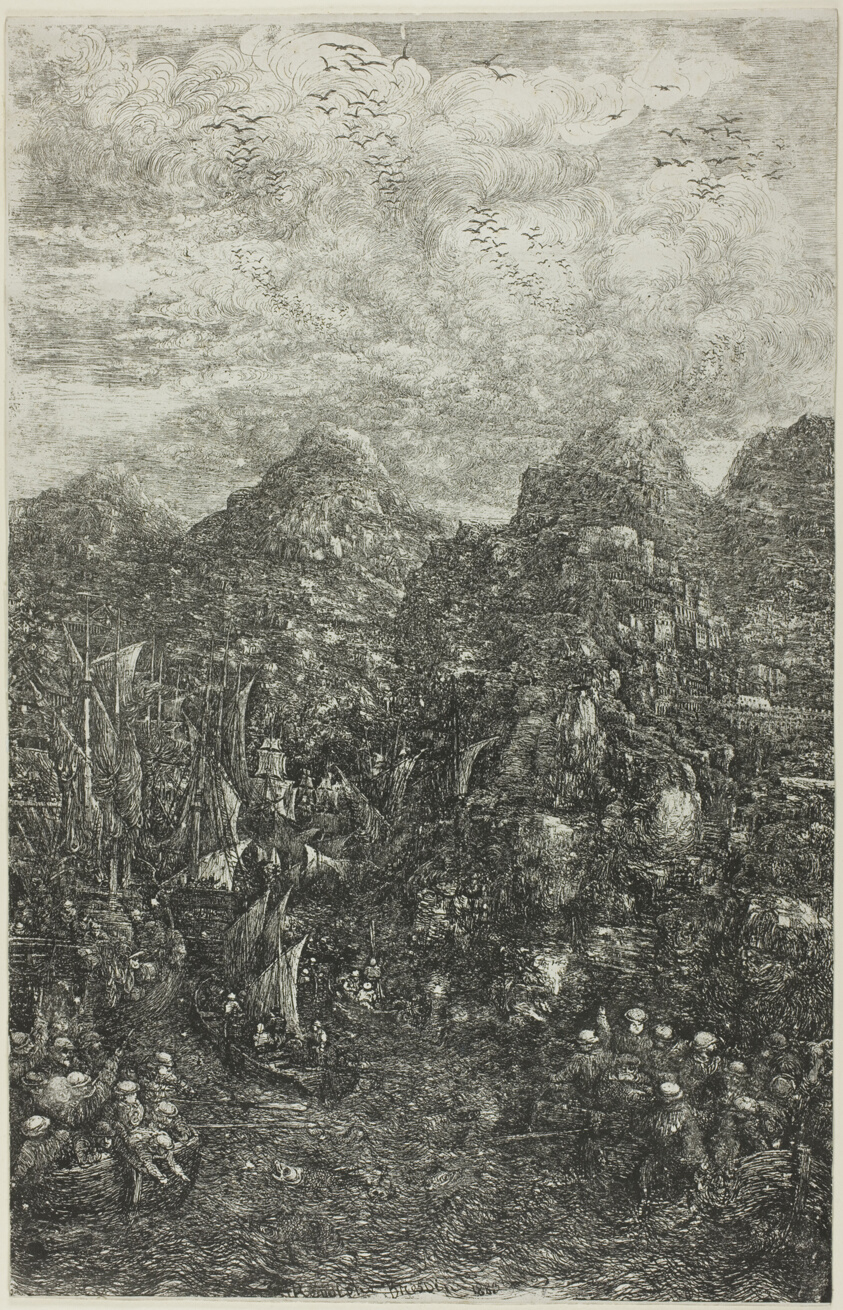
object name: Print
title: The Miraculous Draught of Fishes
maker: Rodolphe Bresdin (French, 1825-1885)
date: 1883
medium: Lithograph on gray chine laid down on ivory wove paper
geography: France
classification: lithograph; print; prints and drawing